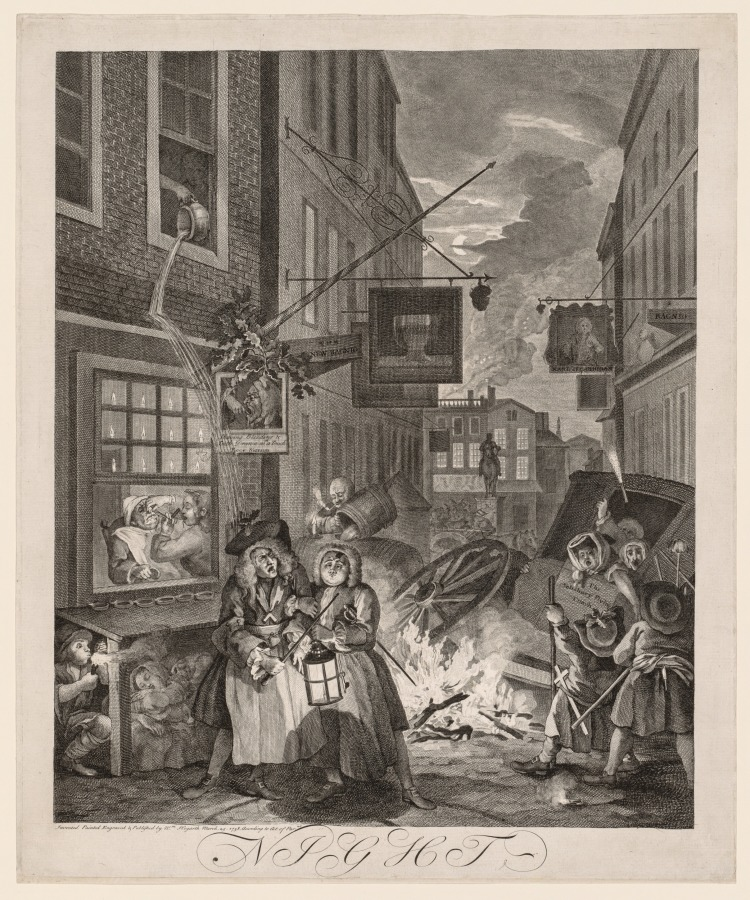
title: The Four Times of Day: Night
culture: England, 18th century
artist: William Hogarth (British, 1697–1764)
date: 1738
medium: engraving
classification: Print